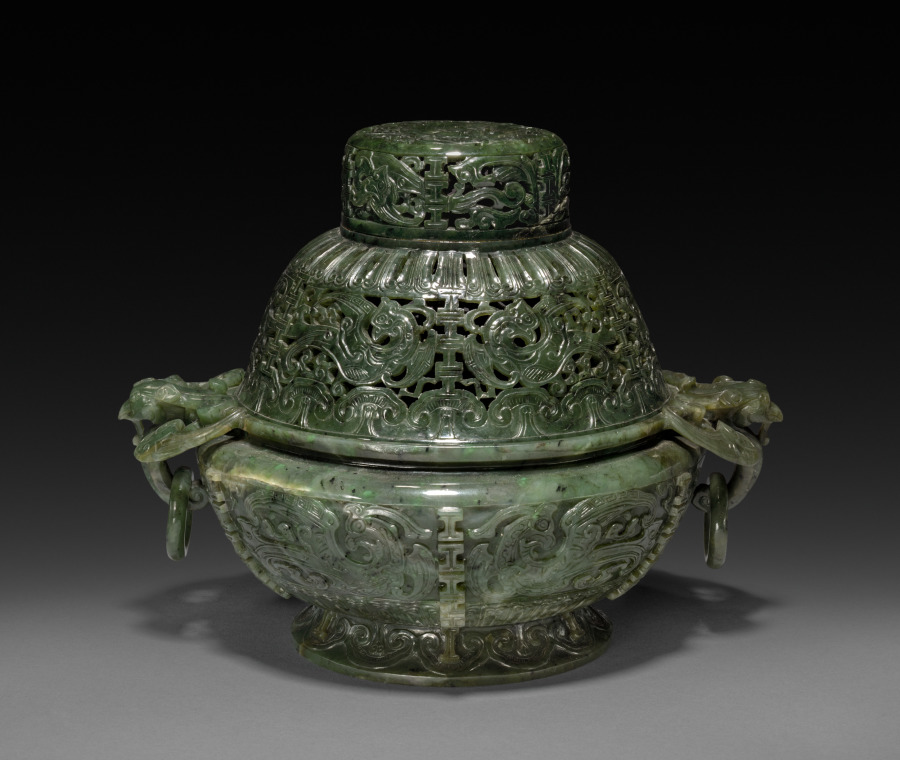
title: Koro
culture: China, Qing dynasty (1644–1911), Qianlong reign (1736–95)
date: 1736–95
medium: jade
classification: Jade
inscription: Qianglong mark on base